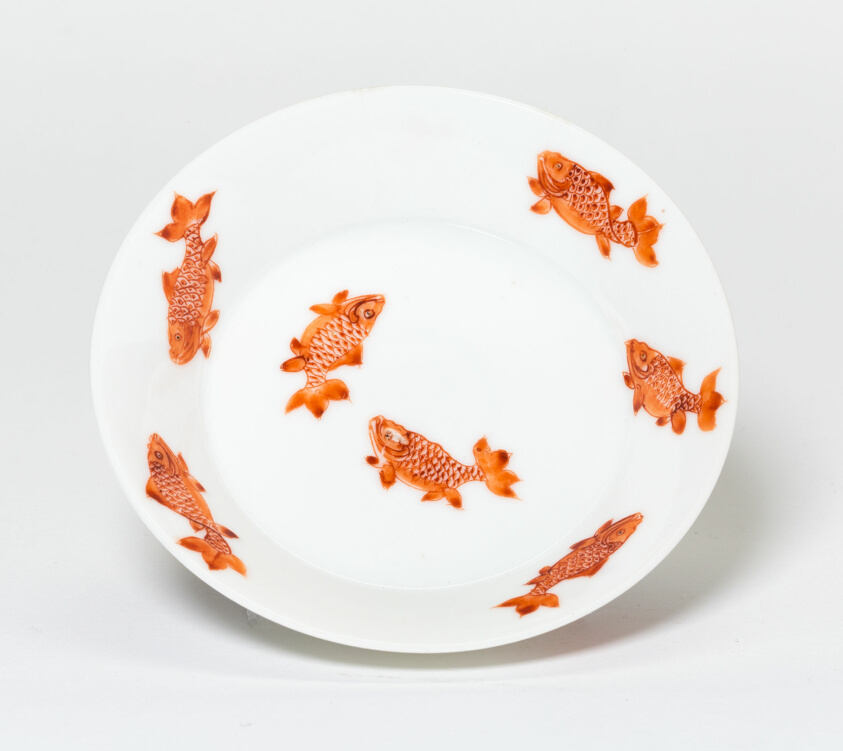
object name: Vessel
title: Dish with Ten Fish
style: Chinese (culture or style)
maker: China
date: Qing dynasty (1644–1911), Yongzheng reign period (1723–1735)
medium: Porcelain painted in underglaze iron red, possibly refired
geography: China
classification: dish (vessel); porcelain; ceramics; asian art; vessel